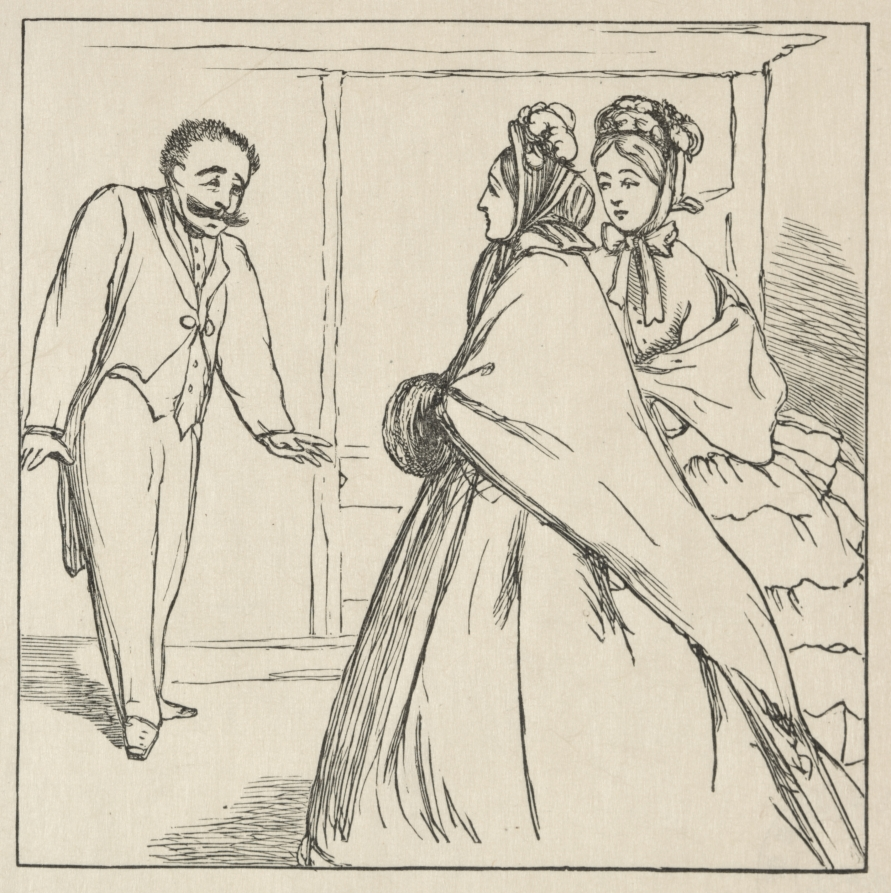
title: Going to Court - How I Went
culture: England, 19th century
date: 1863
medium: wood engraving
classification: Print